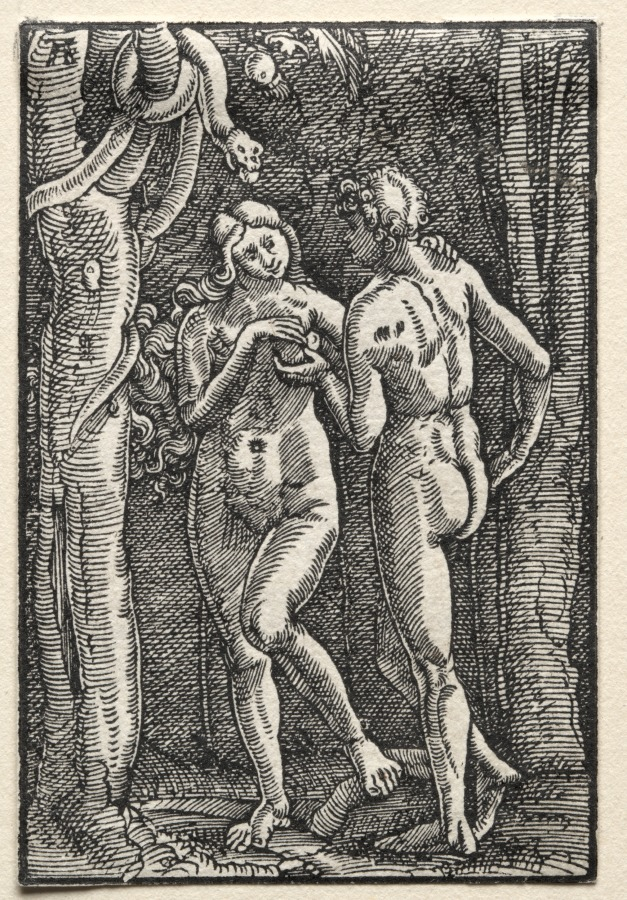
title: The Fall and Redemption of Man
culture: Germany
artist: Albrecht Altdorfer (German, c. 1480–1538)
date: c. 1515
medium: woodcut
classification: Print